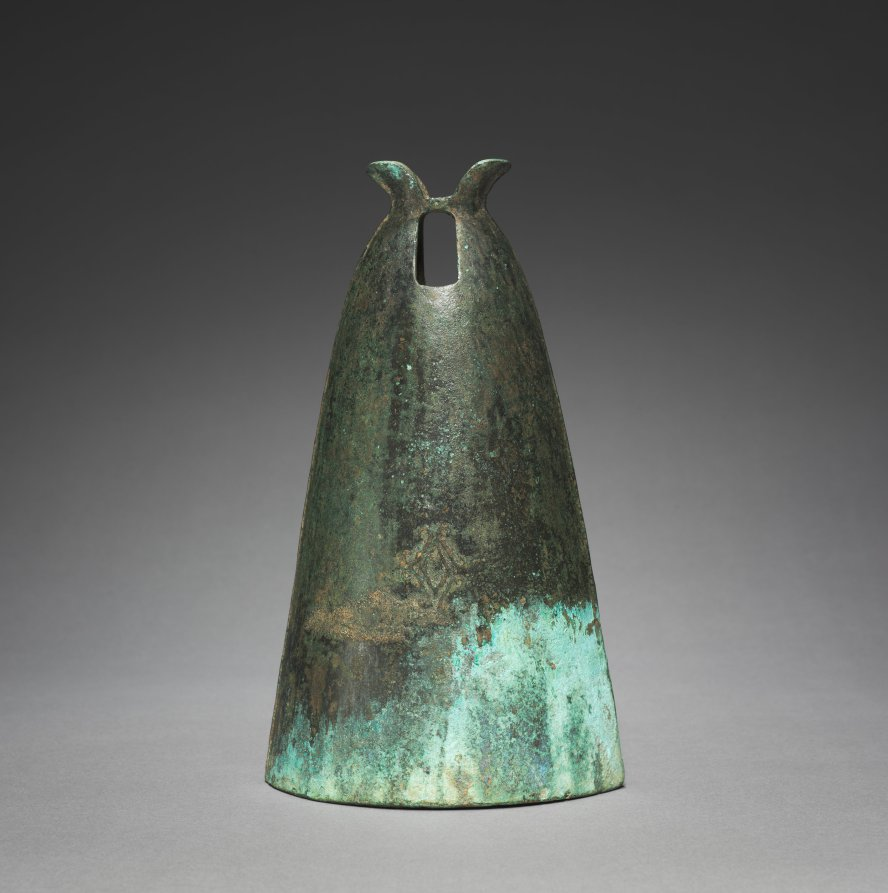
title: Bell with Diamond-Shaped Insignia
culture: China, along the southern borders, Eastern Zhou dynasty (770–256 BCE) to Han dynasty (202 BCE–220 CE)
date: 300s–100s BCE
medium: bronze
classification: Metalwork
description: These rare, elegant bronze bells were made in a tribal village along the southern borders of China. They differ greatly from bells made in the central regions, which often come in large sets and in varying sizes, and feature complex decorative patterns. The distinctive shape of these bells resembles a tall helmet topped by a pair of horns. A rope may have been tied around the horns so that the bells could be suspended. Each bell is decorated with a diamond-shaped insignia—probably to mark tribal affiliation. Although the bells are identical in size, each produces a different tone, which indicates that their casting was a highly refined process.